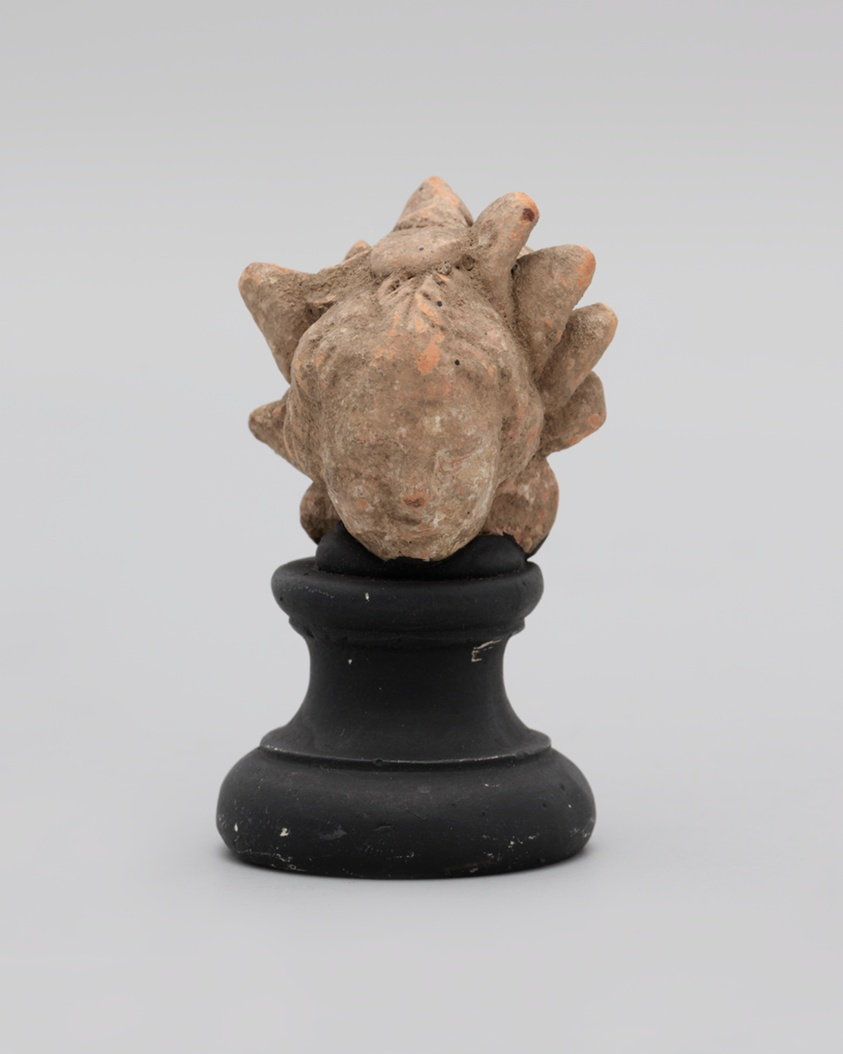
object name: Sculpture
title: Head of a Child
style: greek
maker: Greek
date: 2nd-1st century BCE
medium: terracotta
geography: Greece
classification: earthenware; ceramics; sculpture; ancient art